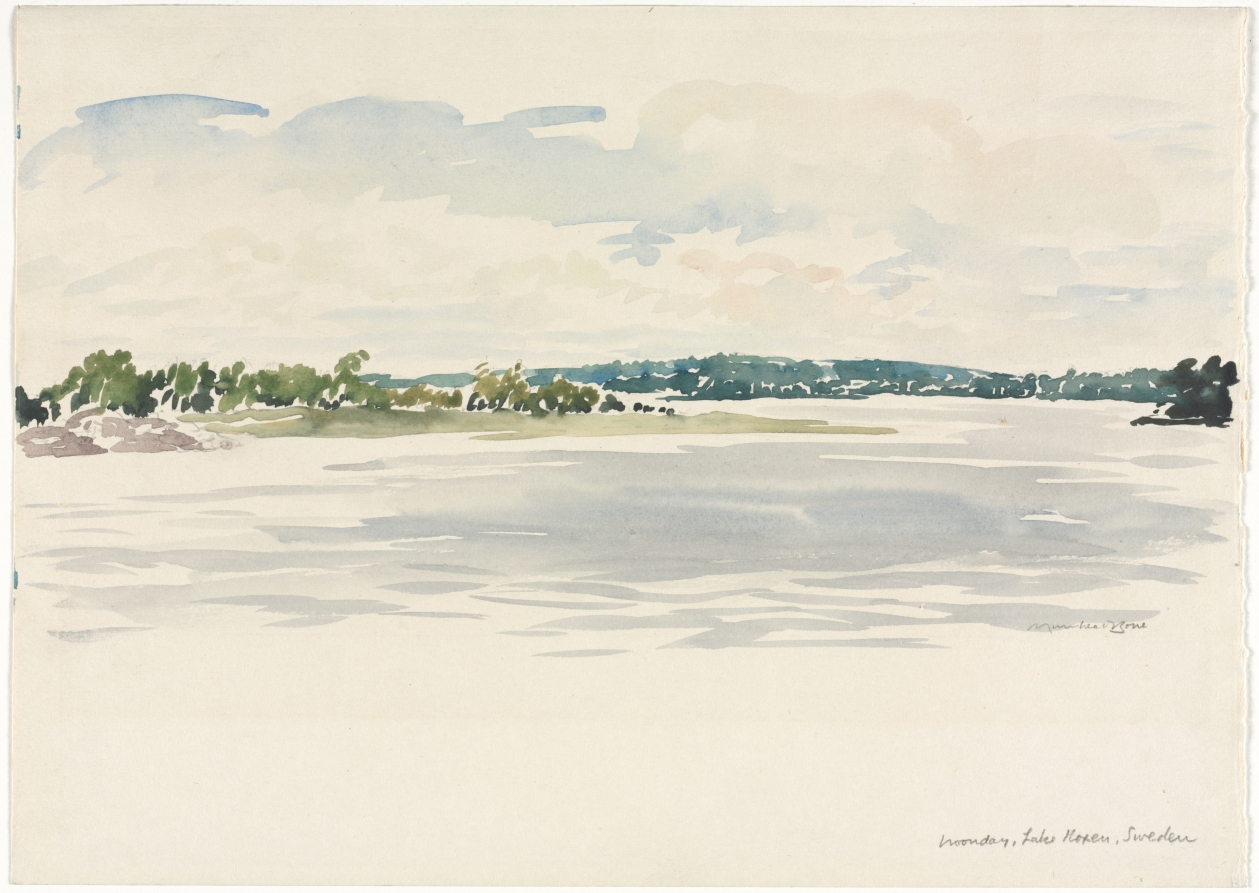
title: Noonday, Lake Noxen, Sweden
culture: England, 20th century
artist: Muirhead Bone (British, 1876–1953)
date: c. 1896–1953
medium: watercolor and graphite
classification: Drawing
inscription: Lower right, in graphite: Muirhead Bone